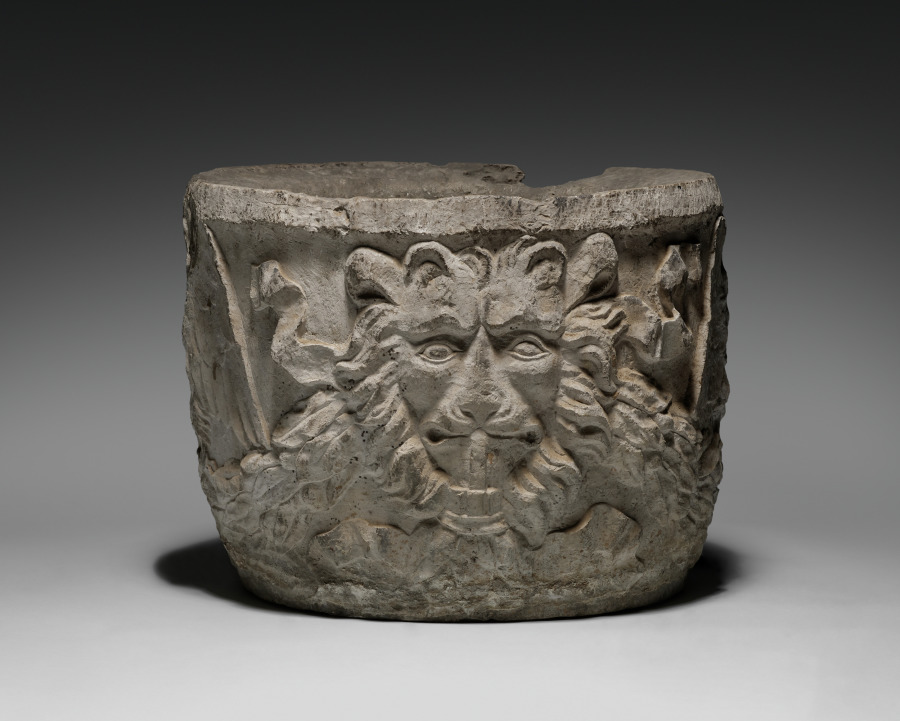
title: Garden Pot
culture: Italy, 19th century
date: 19th Century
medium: stone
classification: Miscellaneous